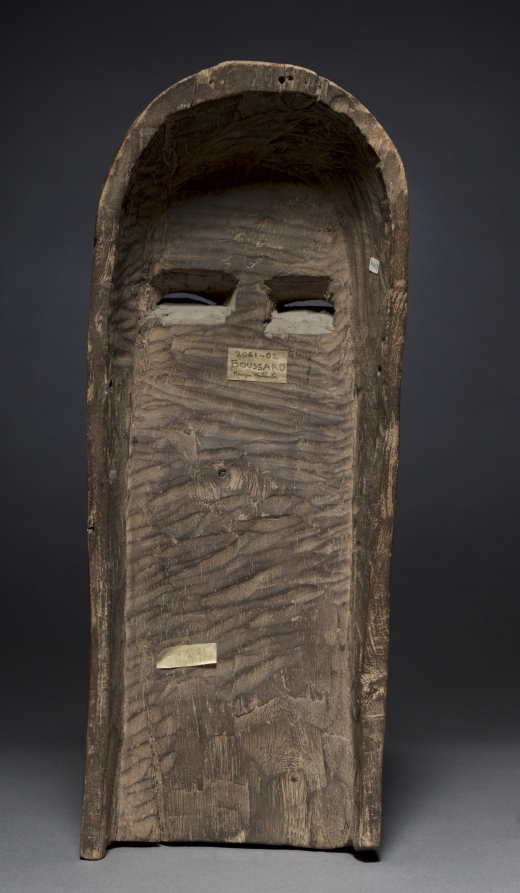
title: Mask (Emangungu)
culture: Africa, Central Africa, Democratic Republic of Congo, Bembe-style maker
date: possibly early 1900s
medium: Wood, kaolin, colorant, and iron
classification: Mask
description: Among the Bembe, anthropo-zoomorphic plank masks are used in circumcision rites called butende. They are worn along with a costume of bark and banana leaves by the initiated boys who beg for food in the village while living in seclusion in the forest. The sculpture’s short projections above the forehead are identified as an owl’s tufts. The two pairs of eyes could refer to divination.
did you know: White kaolin clay highlights the eyes of this carved wooden mask.